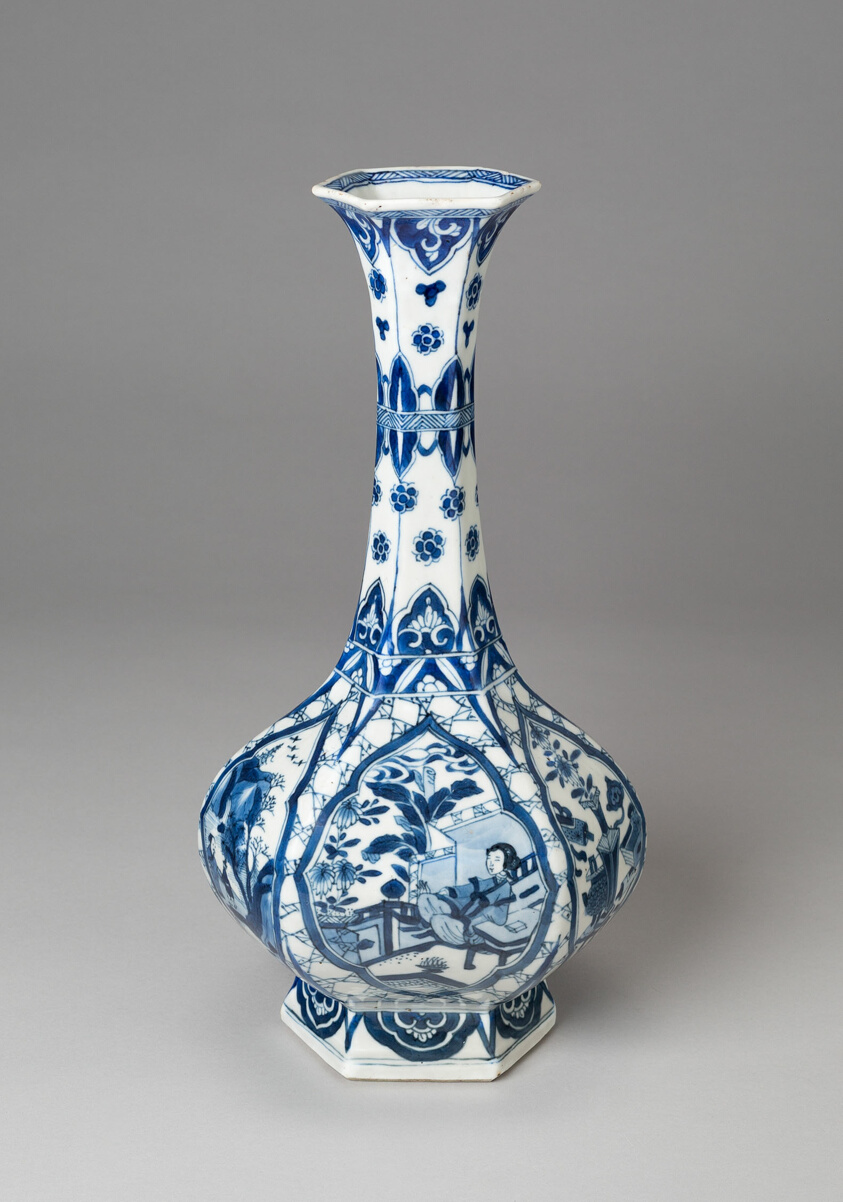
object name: Decorative Arts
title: Vase with Figures, Landscape, and Auspicious Symbols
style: Chinese (culture or style)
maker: China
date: Qing dynasty (1644–1911), Kangxi period (1662–1722)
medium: Porcelain painted in underglaze blue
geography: China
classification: vase; porcelain; vessel; asian art; ceramics; decorative arts